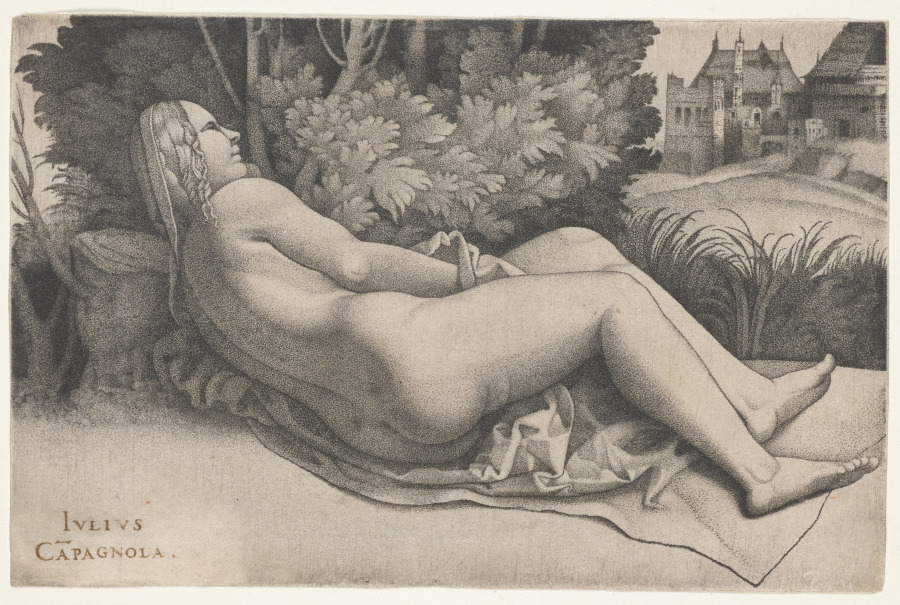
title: Venus Reclining in a Landscape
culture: Italy, late 15th-early 16th Century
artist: Giulio Campagnola (Italian, 1482–1515)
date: c. 1508–9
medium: engraving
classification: Print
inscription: Watermark: two crossed arrows (similar to Briquet 6270)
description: The Venetian artist Giulio Campagnola introduced the "dot manner," an engraving technique by which shading is created with dots and flicks produced with the point of the burin. This innovation allowed for a much greater range of tone and subtler gradations from dark to light. The effect imitated sfumato, a painting technique for creating soft atmospheric effects practiced by Venetian artists, such as Giorgione, at the time. The influence of and perhaps even the engraver’s collaboration with Giorgione is reflected in the extraordinary beauty and refinement of this rare early impression of Venus Reclining in a Landscape. The female nude reclining in a landscape was to become a distinctly Venetian subject in the 1500s.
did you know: This artist's training as a gem cutter prepared him well for the relatively new art of engraving, which required carving into a copperplate with a sharp instrument called a burin.